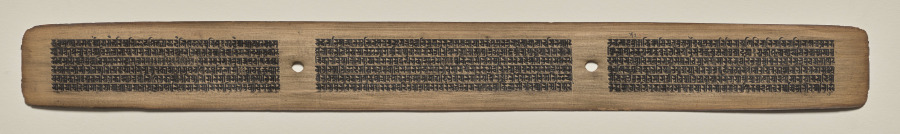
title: Text, Folio 85 (recto), from a Manuscript of the Perfection of Wisdom in Eight Thousand Lines (Ashtasahasrika Prajnaparamita-sutra)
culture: Eastern India, Bihar, Vikramashila Monastery. Painting: Nepal, Kathmandu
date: Sunday, September 14, 1119 (year 239 of the Newar Samvat in the month of Ashvina)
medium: gum tempera and ink on palm leaves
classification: Painting